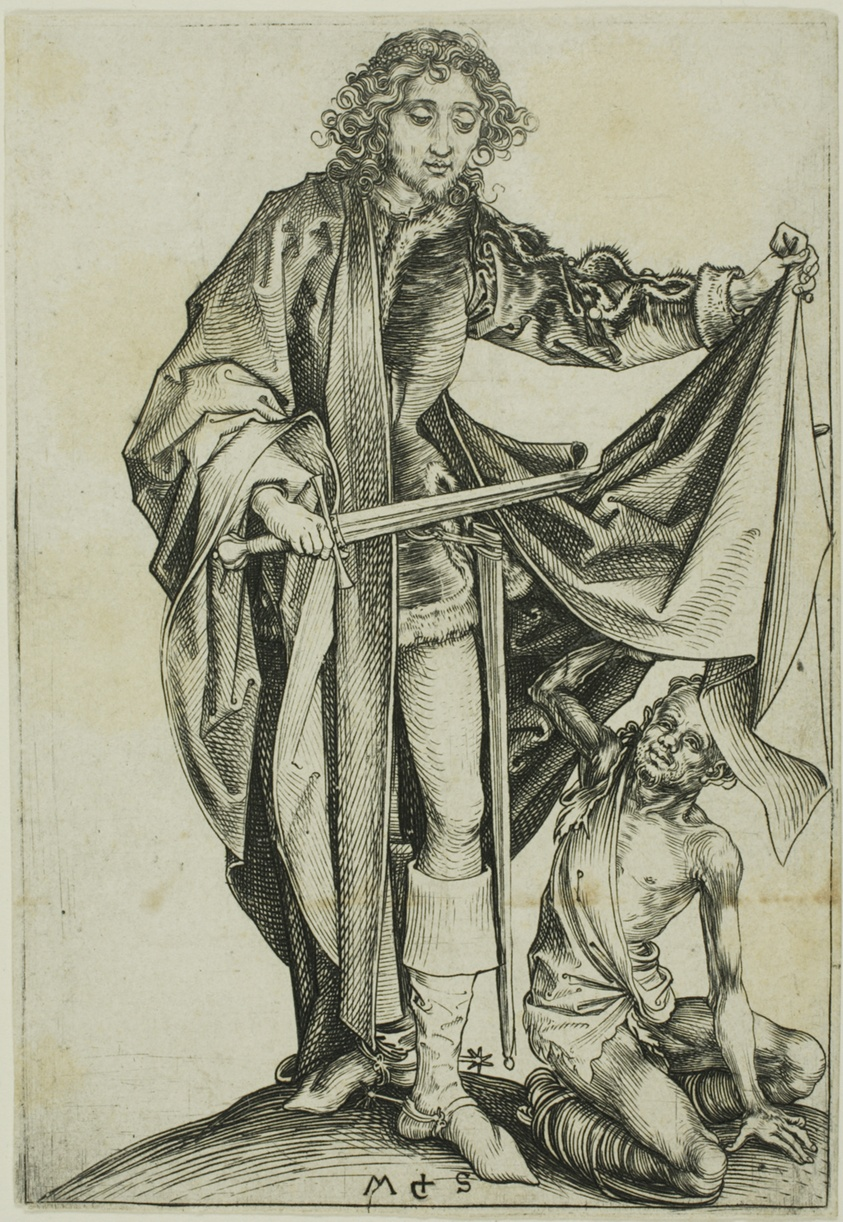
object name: Print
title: St. Martin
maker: Martin Schongauer (German, c. 1430/50-1491)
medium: Engraving on paper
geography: Germany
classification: engraving; print; prints and drawing